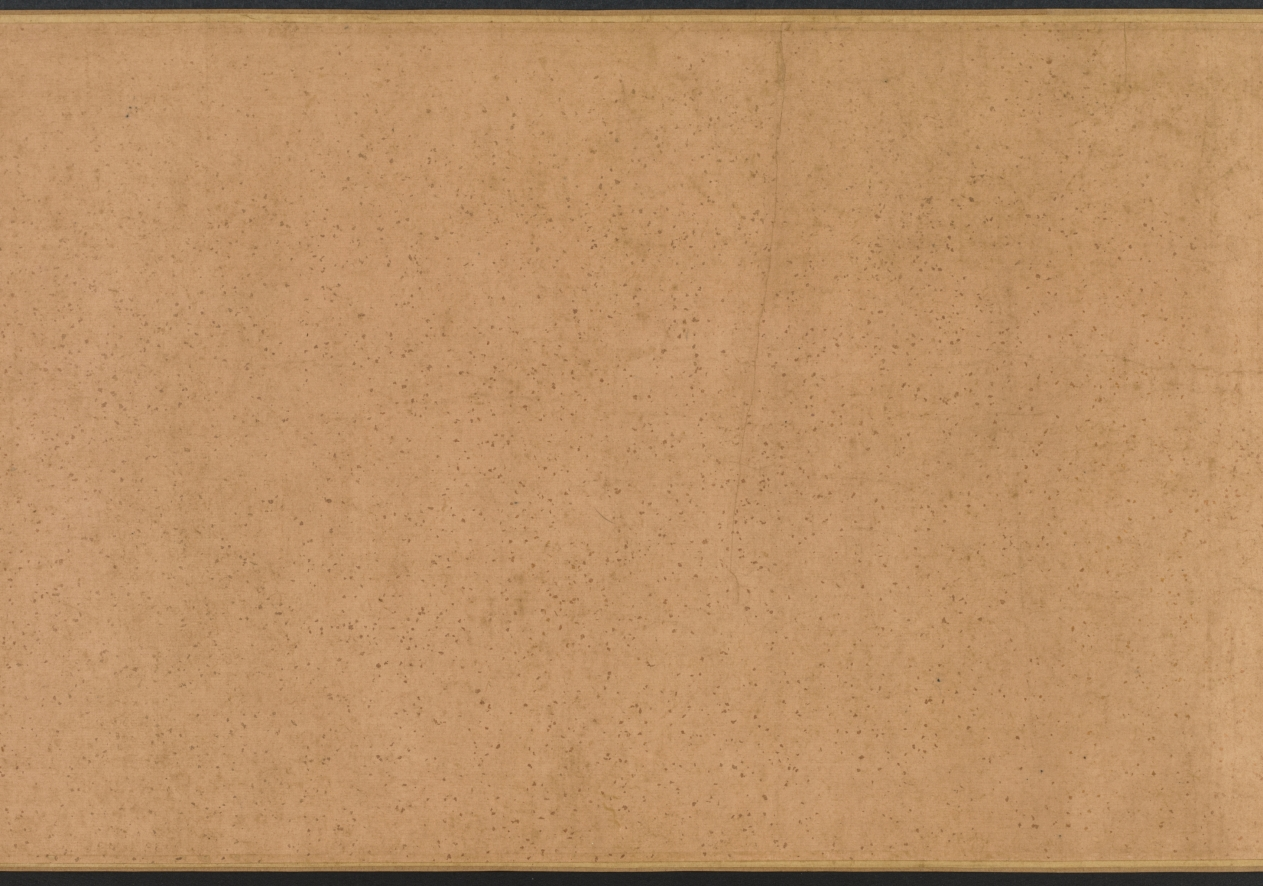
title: The Nine Elders of the Mountain of Fragrance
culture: China, Ming dynasty (1368–1644)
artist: attributed to Xie Huan (Chinese, c. 1370-c.1450)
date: 1426–52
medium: handscroll, ink and color on silk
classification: Painting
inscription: 4 seals: 2 of Xiang Yuanbian 項元汴 (1525–1590); 1 of the Qianlong Emperor (r. 1736-95); 1 of C. C. Wang 王季遷 (1907–2003)